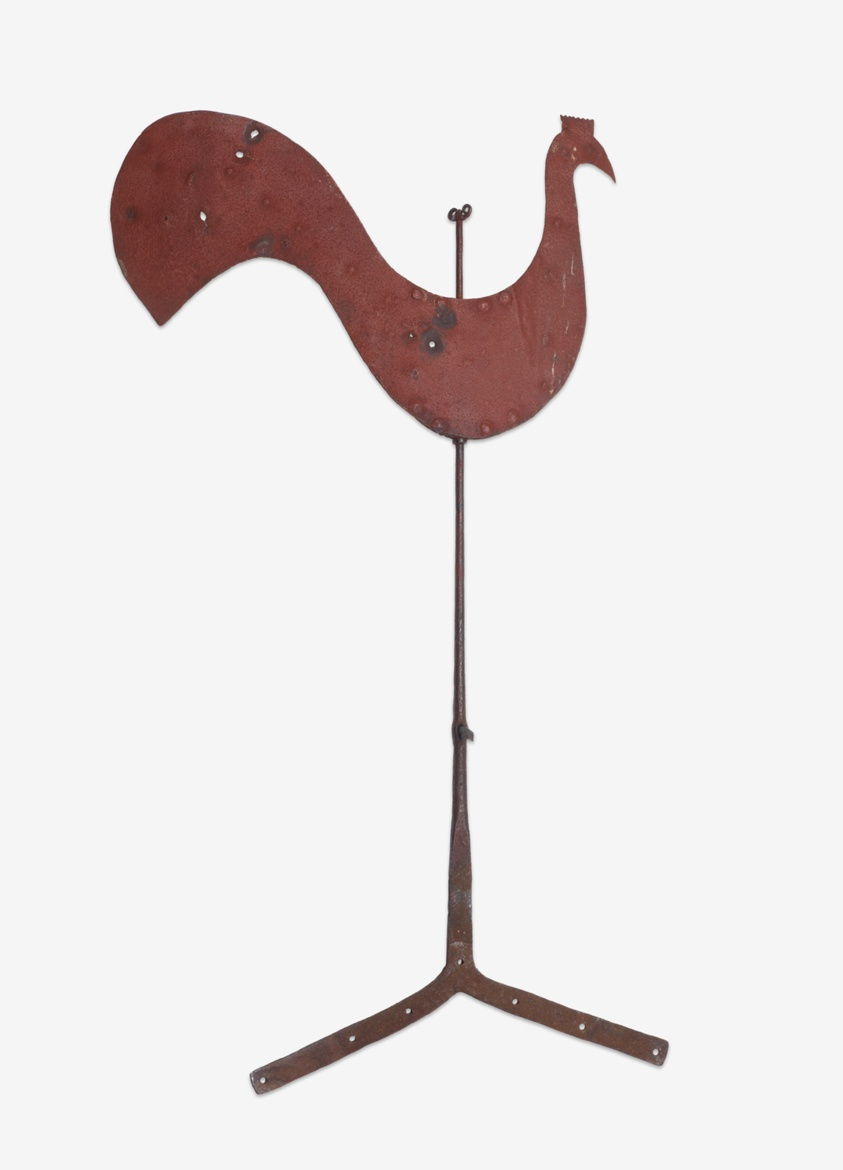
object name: Decorative Arts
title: Peacock Weather Vane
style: Folk Art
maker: Artist unknown (American, active 19th century); Pennsylvania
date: 1800–60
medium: Pennsylvania Iron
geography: Pennsylvania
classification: metalwork; american decorative arts; american arts; decorative arts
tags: animals, beasts